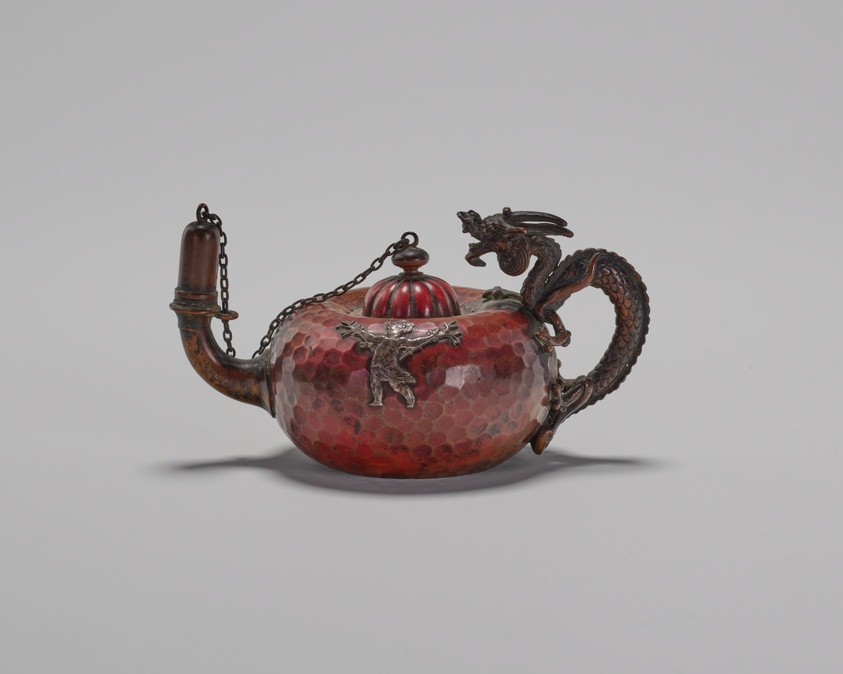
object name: Decorative Arts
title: Cigar Lighter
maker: Gorham Manufacturing Company (American, founded 1831); Providence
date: c. 1900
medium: Copper and mixed metals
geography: Providence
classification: american decorative arts; decorative arts